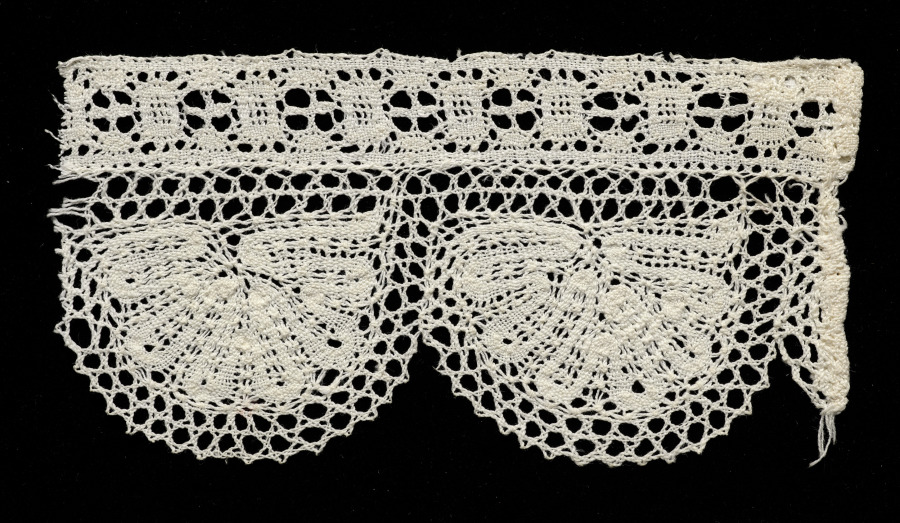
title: Lace Edging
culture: Spain, Huelva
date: 1500s–1600s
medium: Bobbin lace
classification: Lace